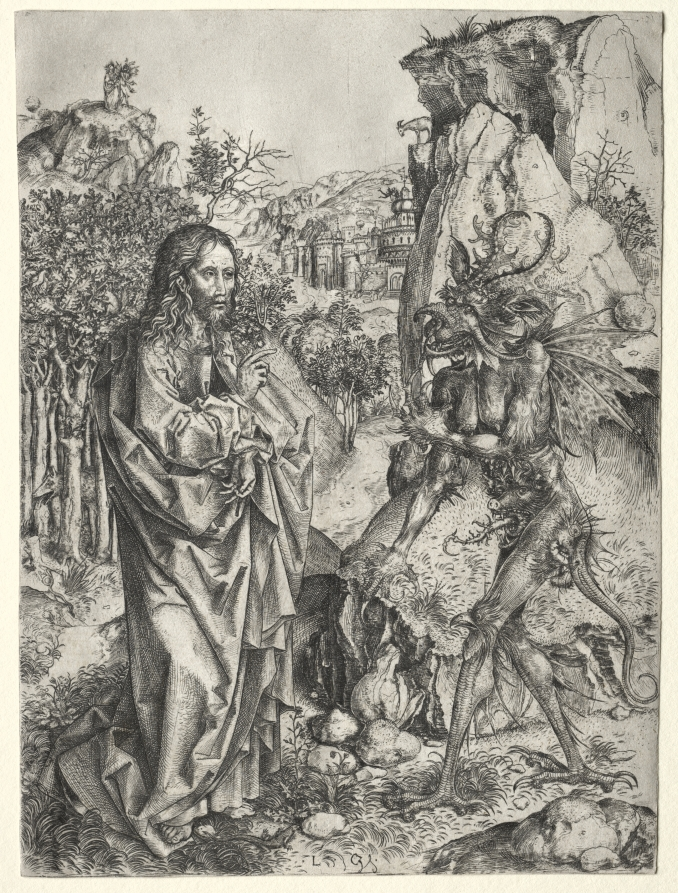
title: The Temptation of Christ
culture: Germany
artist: Master L Cz (German)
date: 1400s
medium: engraving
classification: Print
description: Following his baptism, Christ fasted in the wilderness for 40 days, after which he was tempted three times by the devil. In this scene, the devil points to some stones. “If you are the Son of God, tell these stones to become bread,” the devil taunts. Satan is depicted in a loathsome manner with horns, a scaly body, and wings and claws for hands and feet. Because the desert was the traditional home of demons, temptation in one form or another lay in wait for those who ventured there, as seen here and in the depictions of Saint Anthony of Egypt nearby.